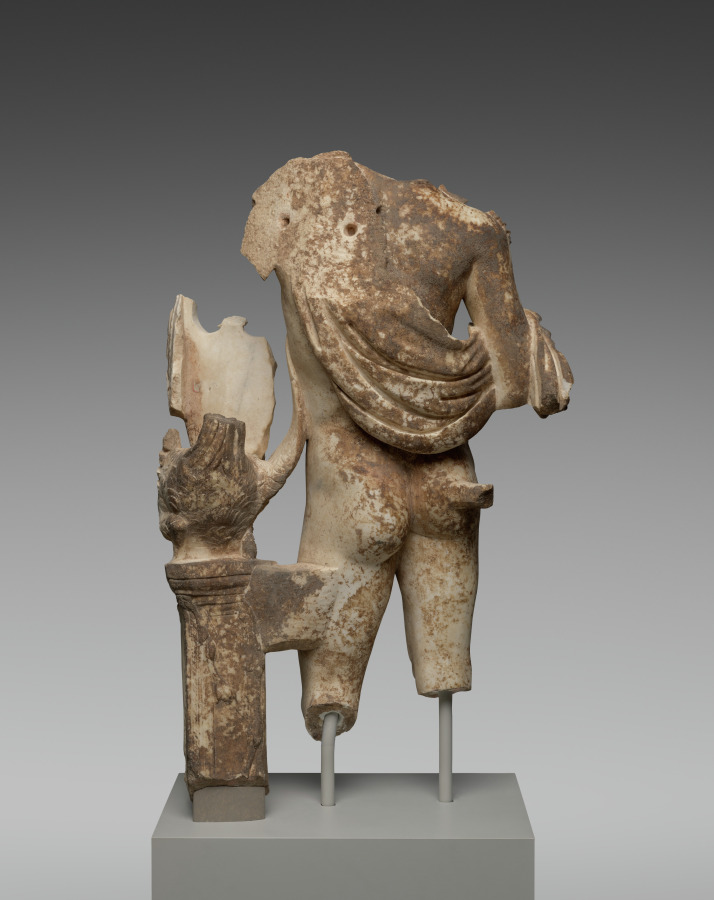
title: Torso of Apollo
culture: Italy, Roman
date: c. 100–200 CE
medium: marble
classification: Sculpture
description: This ancient statue depicts the Greek god Apollo, identified by his youthful body and the fragmentary remains of his kithara, a type of lyre (or stringed instrument) used by poets and musicians in ancient Greece. Both the kithara, decorated with griffins, and the swan upon which it rests (atop a triangular column), signify Apollo’s roles as the god of music and leader of the Muses. Beloved by the Muses for their song, swans were considered sacred to Apollo because he gave them the gift of prophecy. Swans sing a glorious song before they die, knowing they will soon return to Apollo to be reborn.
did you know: Apollo received his lyre from Hermes, who invented it.